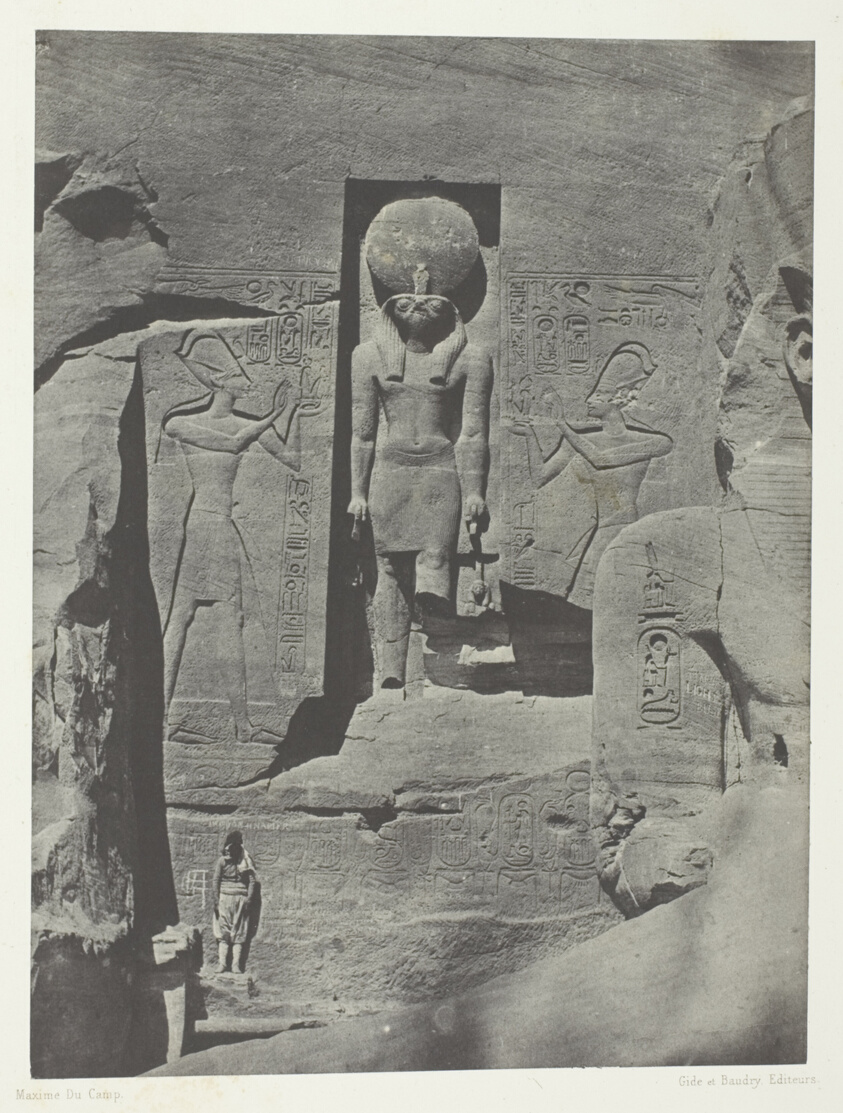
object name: Photograph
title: Ibsamboul, Sculptures de l'Entrée du Spéos de Phrè, Nubie, plate 105 from the album "Egypte, Nubie, Palestine et Syrie" (1852)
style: 19th century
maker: Maxime Du Camp (French, 1822–1894)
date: 1849/51, printed 1852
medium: Salted paper print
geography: France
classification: salted paper print; photographic process; photography; photograph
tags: Collected by Hugh Edwards, Egypte, Nubie, Palestine et Syrie